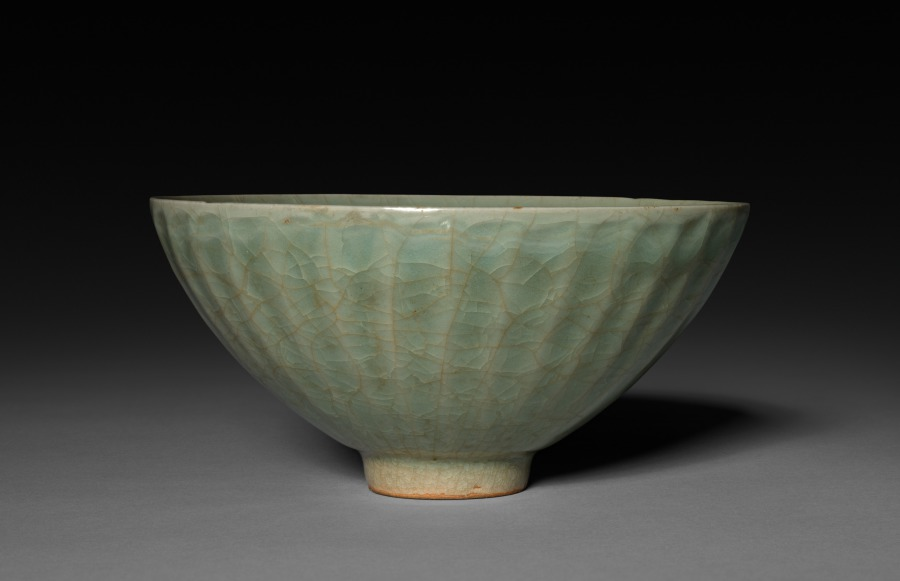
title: Bowl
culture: China, Southern Song dynasty (1127-1279)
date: 1200s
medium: glazed buff stoneware, Southern Celadon ware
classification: Ceramic